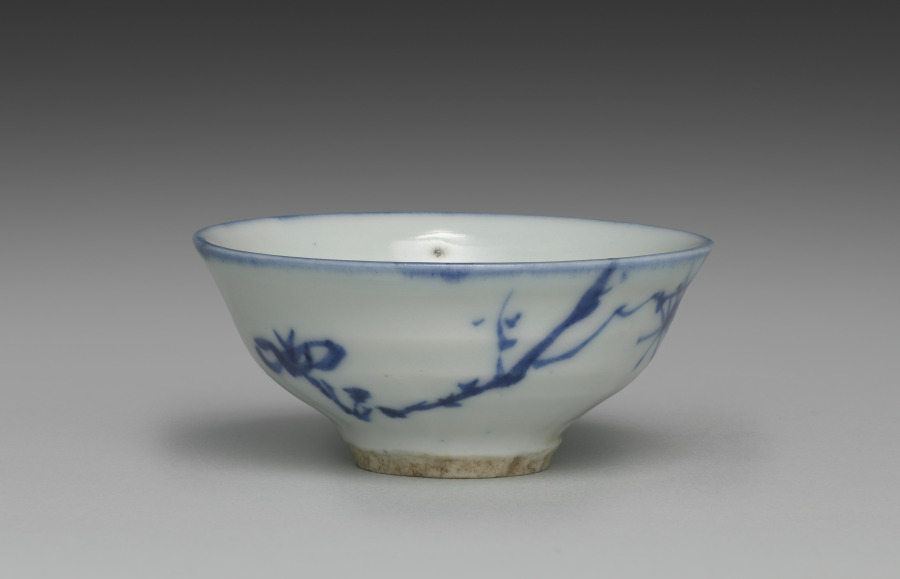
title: Sake Cup with Auspicious Plants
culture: Japan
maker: Seifū Yohei II (Japanese, 1844–1878)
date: 1861–78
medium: One of a pair of sake cups; porcelain with underglaze blue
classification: Ceramic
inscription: 松梅芝仙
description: Seifū Yohei II excelled as a painter, as evidenced by his floral and landscape designs. His works were selected as the best among Kyoto ceramics shown to jurists from Europe and the US, thus paving the way for international recognition of the studio in the late 1800s.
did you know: The plum and the pine are two of the "Three Friends of Winter," auspicious symbols of a cultured scholar's virtues: steadfastness, resilience, and flexibility.